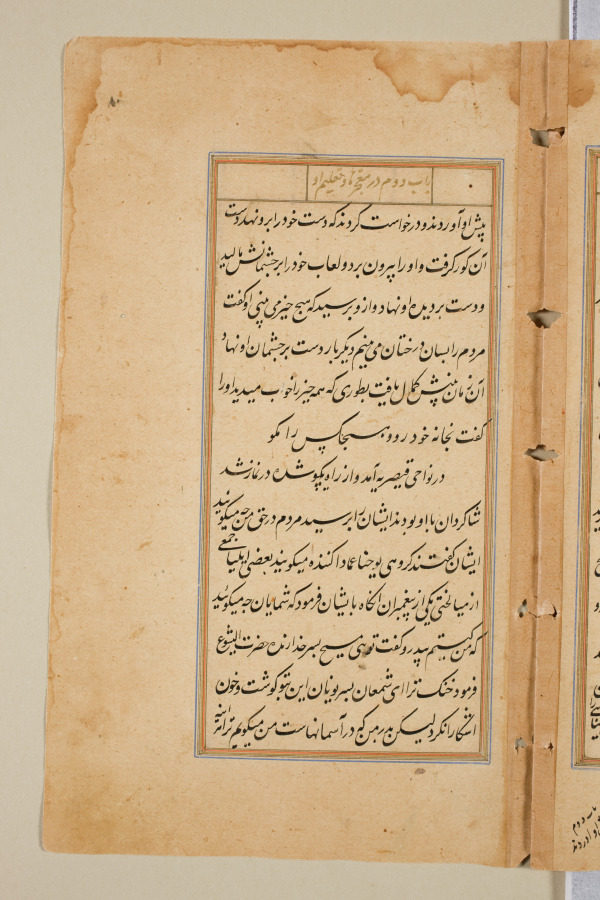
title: Text page from a Mirror of Holiness (Mir’at al-quds) of Father Jerome Xavier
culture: Mughal India, Allahabad, made for Prince Salim (1569–1627)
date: 1602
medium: Ink and gold on paper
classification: Manuscript